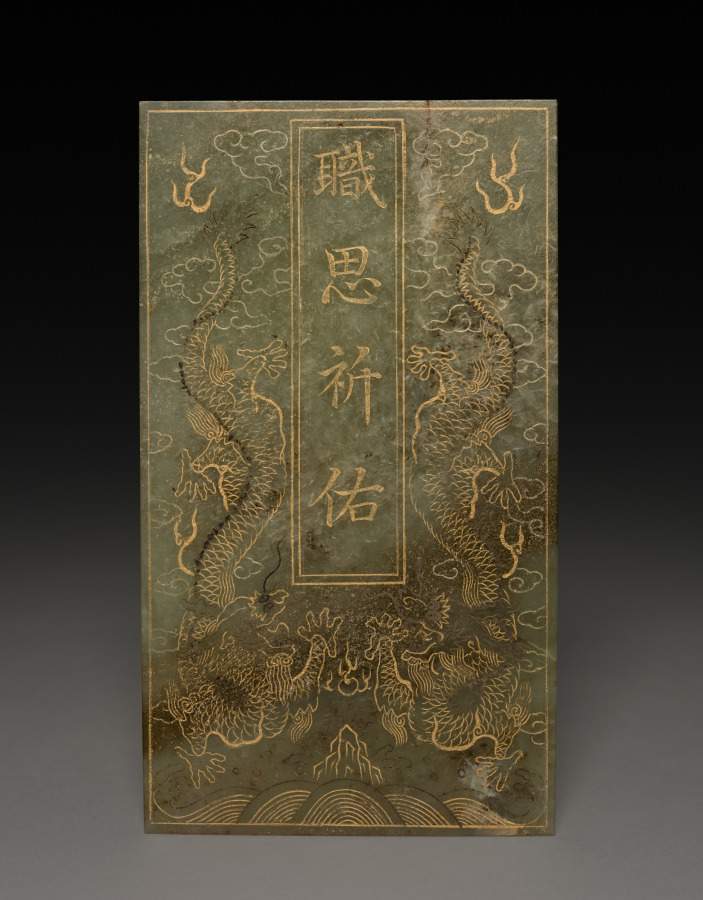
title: Tablet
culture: China, Qing dynasty (1644–1911), Qianlong reign (1736–95)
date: 1778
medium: jade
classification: Jade